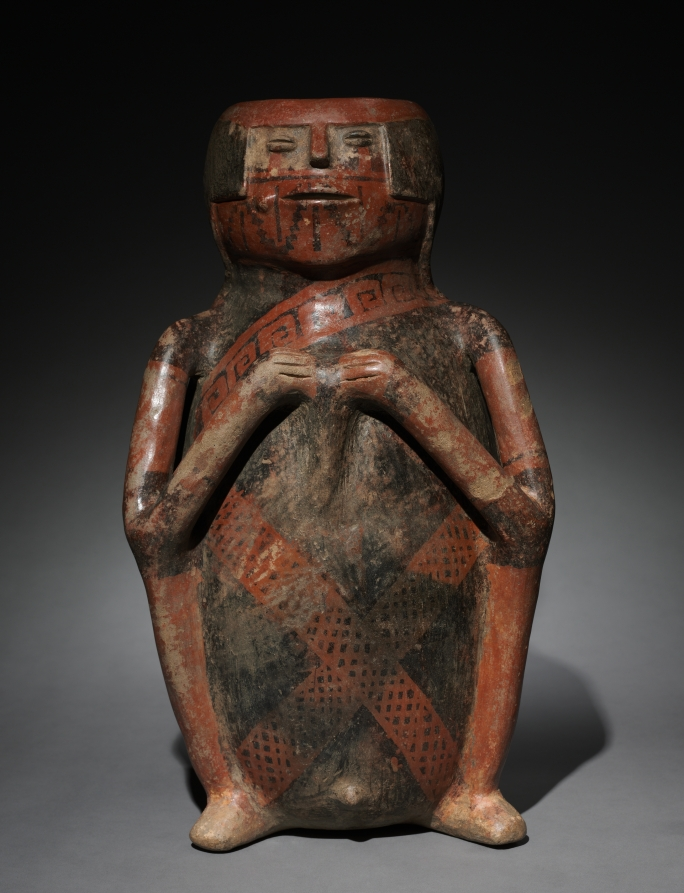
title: Anthropomorphic Vase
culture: Colombia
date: 500–1500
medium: earthenware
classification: Ceramic